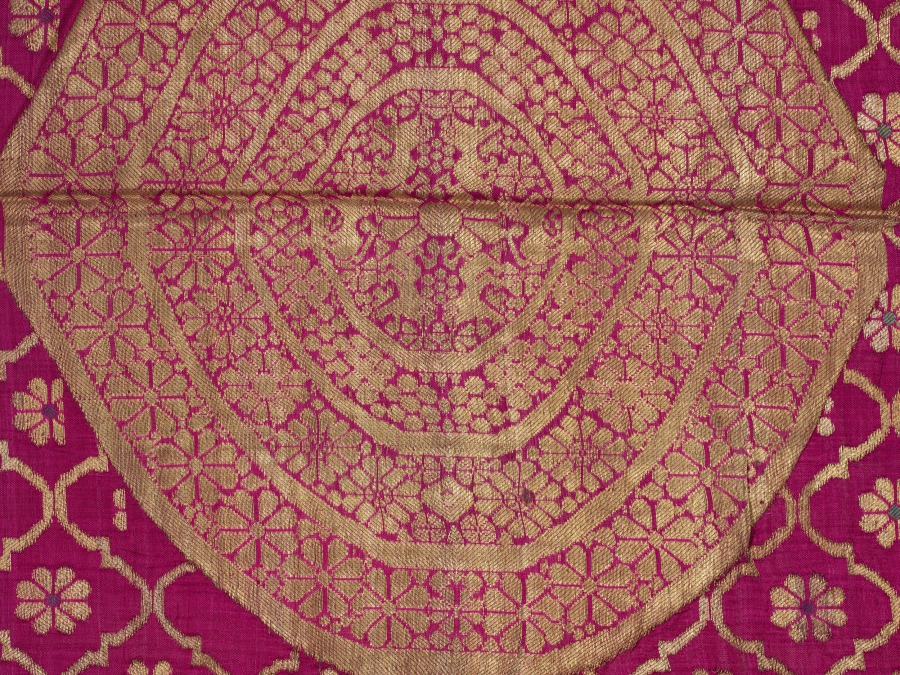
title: Fragment of Gold Cloth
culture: India, 19th century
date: 1800s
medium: brocade; silk, gold and silver threads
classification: Textile